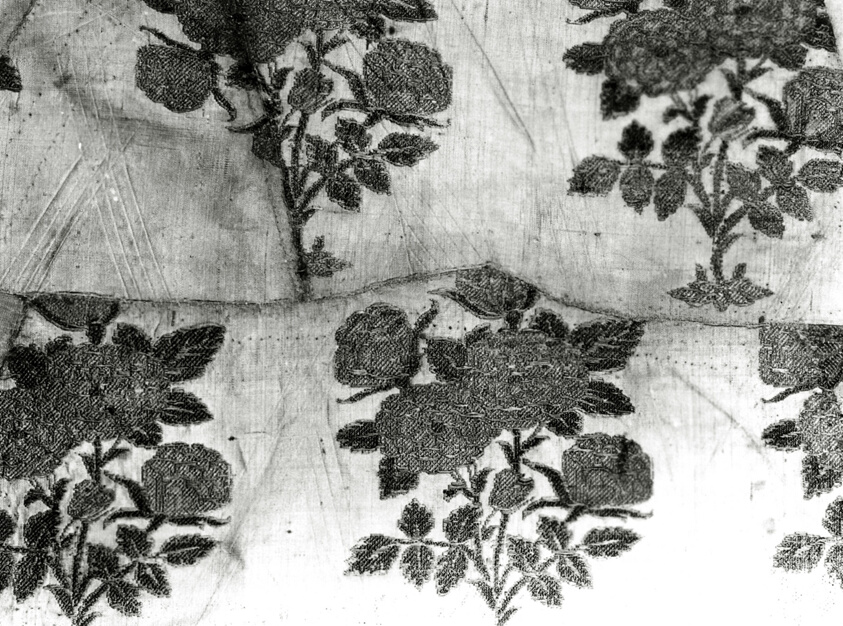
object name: Textile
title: Fragment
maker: Iran (Persia)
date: 1650/1800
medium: Silk and gold wound on yellow silk core brocaded plain cloth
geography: Iran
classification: textile; weaving